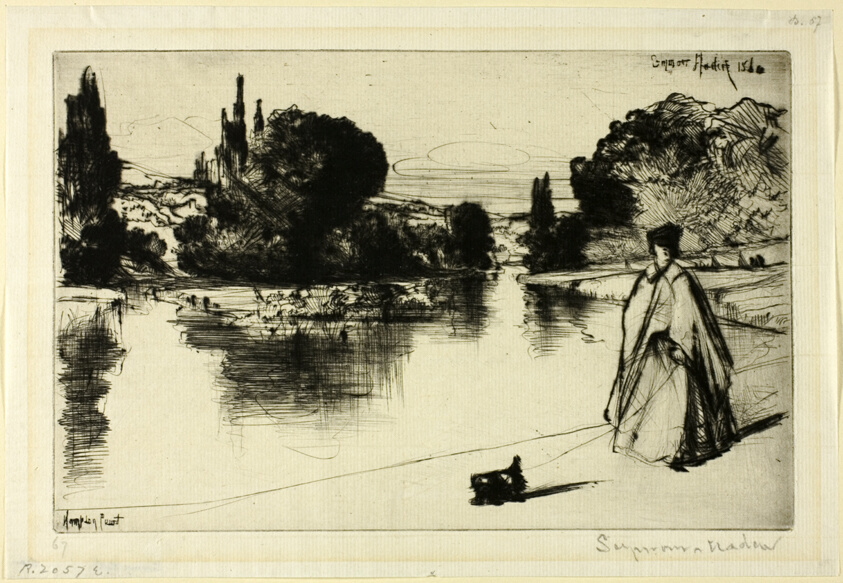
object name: Print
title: The Towing Path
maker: Francis Seymour Haden (English, 1818-1910)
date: c. 1864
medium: Etching and drypoint on copper printed on ivory laid paper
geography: England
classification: drypoint; print; prints and drawing